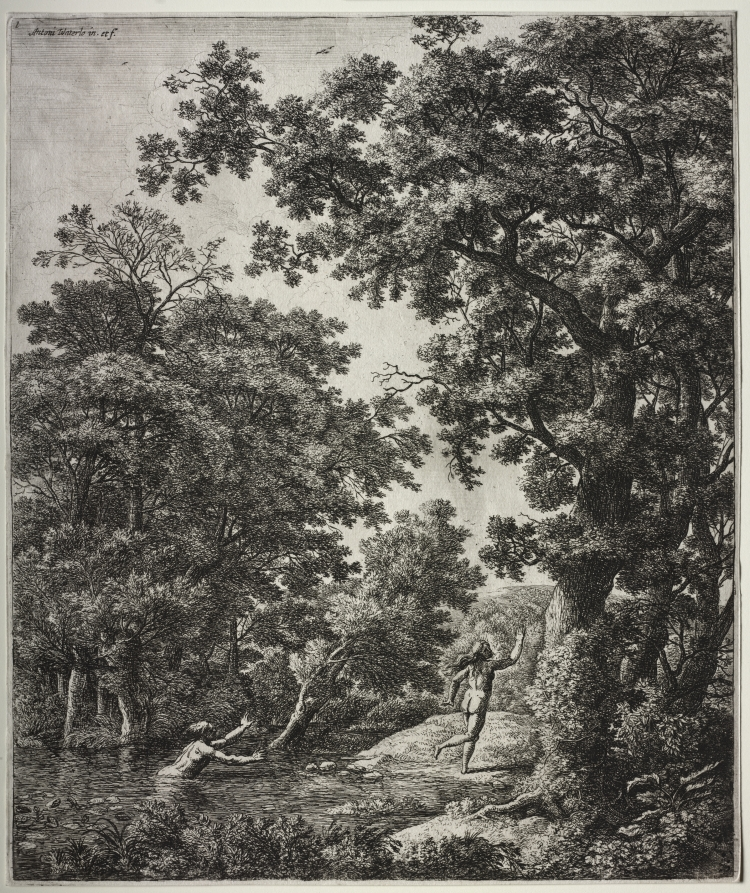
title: Six large upright landscapes with scenes from Ovid's Metamorphoses: Alpheus and Arethusa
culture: Netherlands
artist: Anthonie Waterloo (Dutch, 1609/10–1690)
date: 1640–90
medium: etching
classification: Print